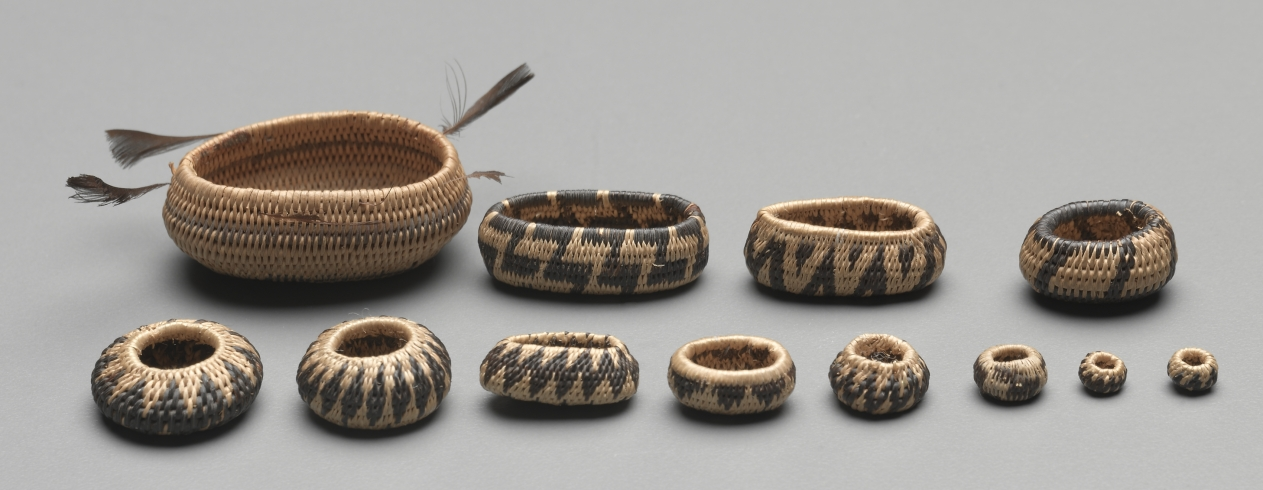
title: Miniature Oval Basket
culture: California, Pomo, late 19th-early 20th century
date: late 1800s-early 1900s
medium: plant materials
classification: Basketry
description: Miniature baskets were made to demonstrate the basket-maker’s virtuoso skill, and these tiny marvels seem to be no exception—the smallest are just a few millimeters wide but still patterned. For such fine work, dexterity was required as much for preparation of materials as for weaving.